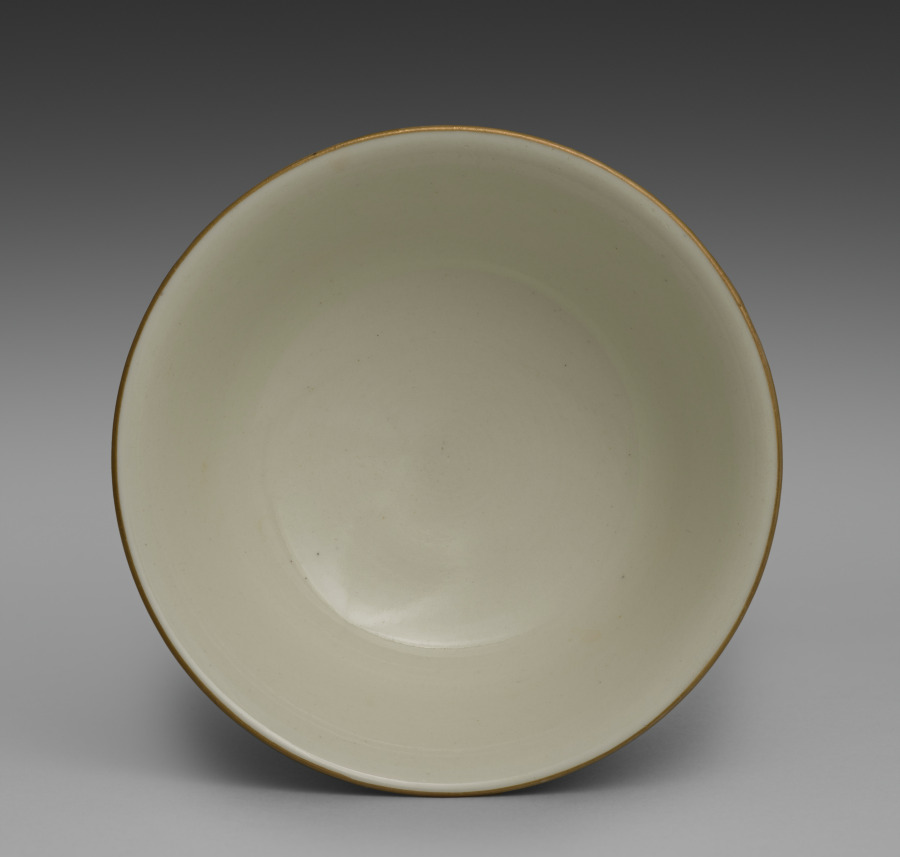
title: Bowl from Dining Set with Plum Blossoms and Cracked-Ice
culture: Japan, Meiji period (1868–1912)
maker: Seifū Yohei II (Japanese, 1844–1878)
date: c. 1875–78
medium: Porcelain with molded designs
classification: Ceramic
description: Each item in this set has a delicate low-relief design of flowering plum branches over scattered, intersecting lines meant to resemble the cracked-ice surface of a frozen body of water and is signed on the base in gold pigment. While Yohei II produced many fine works in underglaze blue, like those produced by Kiyomizu Shichibei, he also made works in quite different styles later in his career, from the early 1870 s. In 1873, he was appointed purveyor to the Industrial Center of Kyoto Prefecture, a designation associated with Kyoto’s efforts to reach an international market through the port of Kobe; and from 1875 until his death, he was involved in national-level projects to present Japanese ceramics across the world. It was during this period that Yohei III was apprenticed to Yohei II, and it has been suggested that this set may in fact be an early example of Yohei III’s work, which he signed with his teacher’s name. Decorated with flowers resembling Japanese textile motifs, the set calls to mind the design of Yohei II’s pair of vases with plum blossoms in the Victoria and Albert Museum. Here, the elaborate trees created for a formal public exhibition setting have been translated into the approachable blossoms of the genteel domestic environment. While the designs are consistent across the pieces, each raised flower petal and pistil and each incised line in the ice was done by hand, so the cups, bowls, and dishes are similar yet unique. The bottoms of two boxes once identified the set’s owner, but the information has been deliberately obscured with black ink. However, inscriptions still visible appear to indicate two occasions, once at the end of July 1886 , and once again in June 1916 , when parts of the set were requested from Hokura in Niigata Prefecture. The location corresponds to a neighborhood in the present-day city of Jōetsu. The surname Tsuji 辻 also appears on a paper tag affixed to one of the box cloths. Future research may possibly reveal more about their provenance. A vase by Yohei III in a private collection combines the formal grandeur of the Yohei II vases in the Victoria and Albert Museum with the gentler design of this dining set, placing flowering plum trees against soft, scalloped-edge clouds resembling those in golden screens.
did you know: The dining wares have a creamy white coloration that the four boxes containing them identify as Korean in style.